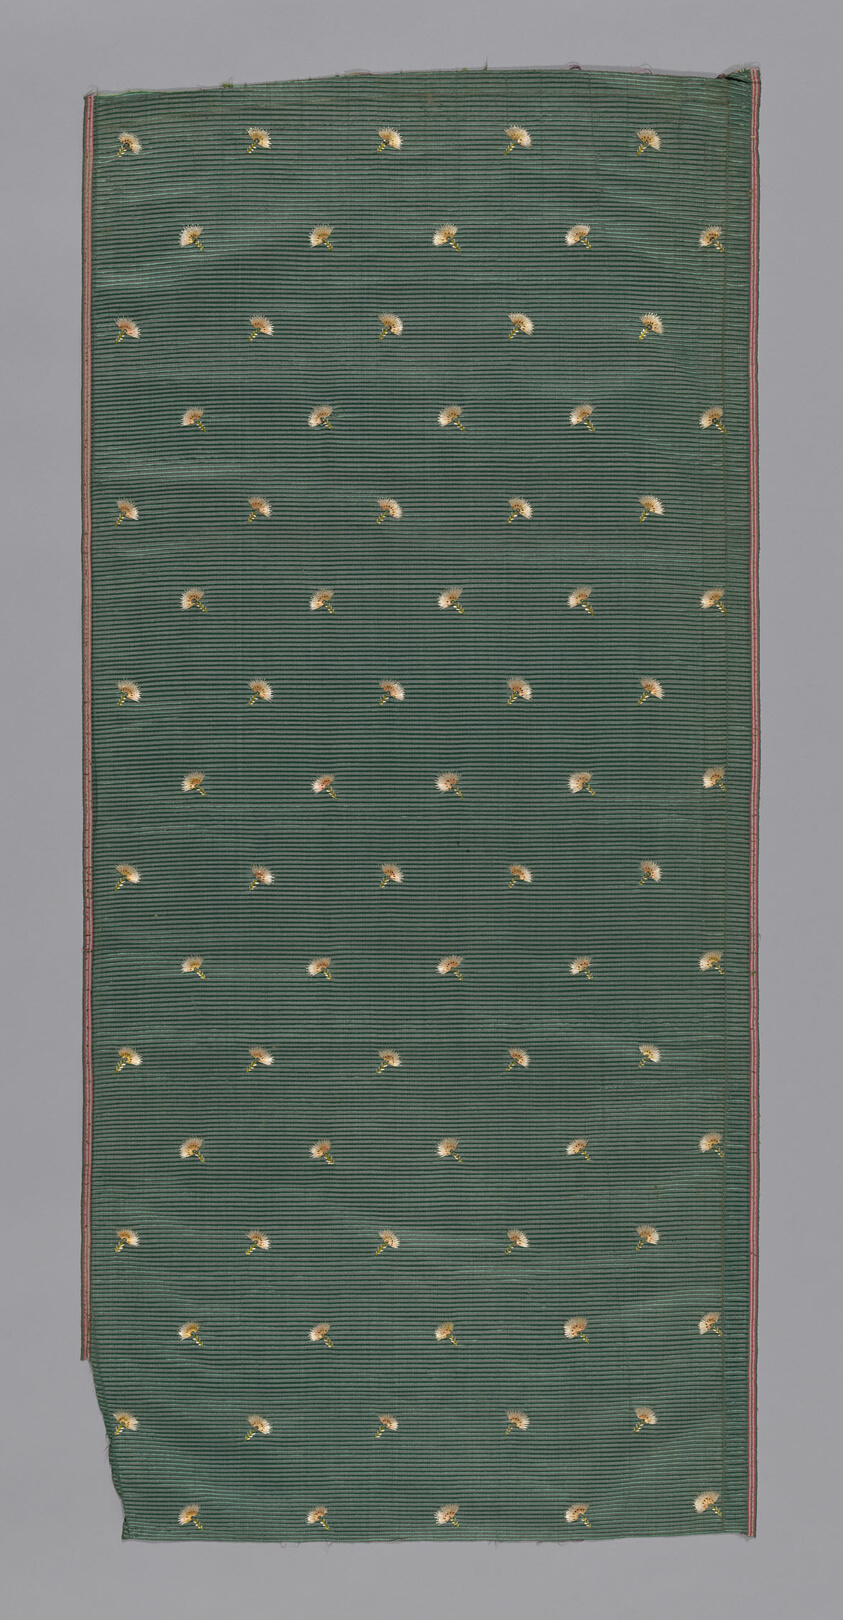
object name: Textile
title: Panel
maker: France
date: 1775/1825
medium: Silk, warp-faced plain weave, alternating with additional warp floats; embroidered in silk threads in satin stitch and French knots; paillettes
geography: France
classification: textile; embroidery